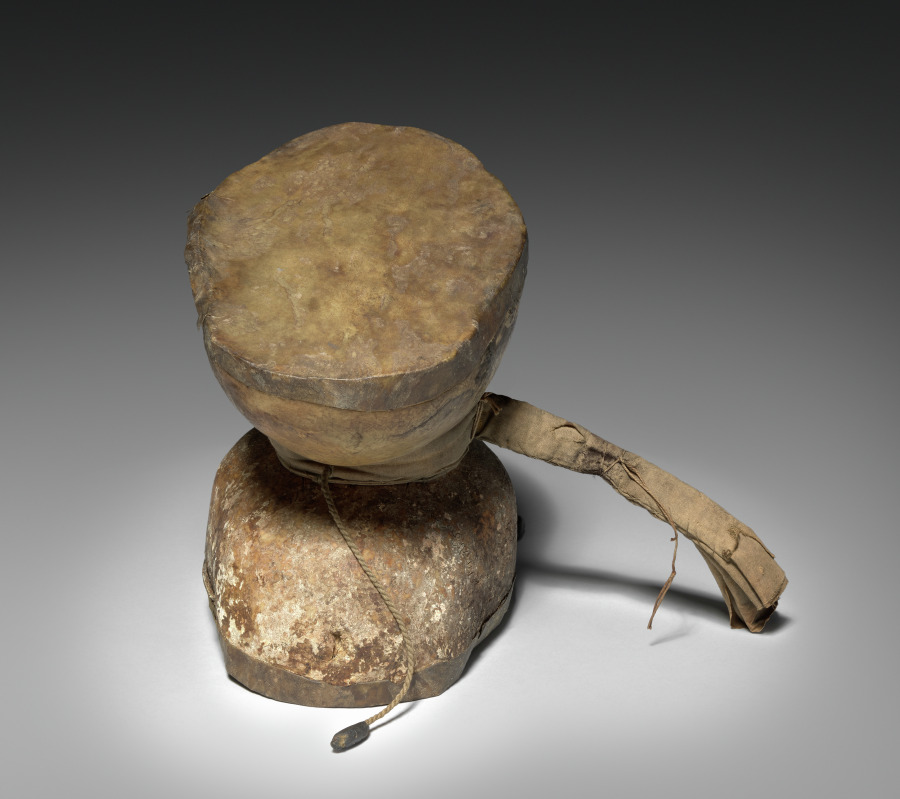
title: Ritual Drum (damaru)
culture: Tibet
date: c. 1800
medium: skull bone, cloth, hemp fiber, leather, and skin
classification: Musical Instrument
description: Damaru drums are made from the tops of two skulls joined in the center and sounded by rapidly turning it side to side so the ends of the cords fly up to sound against the stretched skin. In Hindu and Buddhist rituals, the rhythm of the damaru references the ongoing, relentless beat of time. The material of bone reminds practitioners of the inevitability of death in the course of time.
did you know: Dancing Shiva, in his form as Nataraja, holds a damaru in one hand.